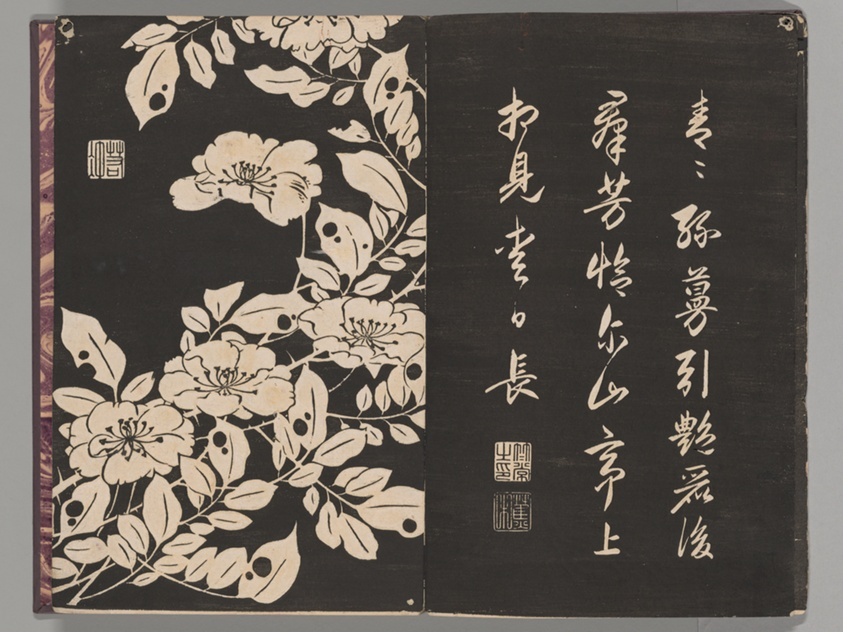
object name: Book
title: Soken sekisatsu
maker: Ito Jakuchu (Japanese, 1716-1800)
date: 1767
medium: Woodblock printed book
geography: Japan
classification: book